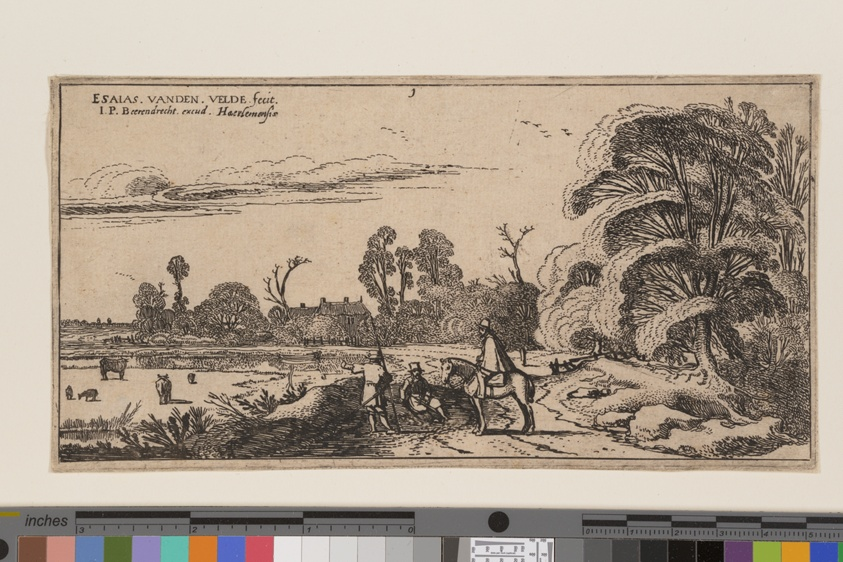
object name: Print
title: Path to the Right of a Field, from Landscapes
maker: Esaias van de Velde; Dutch, 1587–1630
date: c. 1610-1630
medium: Etching on ivory laid paper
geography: Netherlands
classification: etching; paper; print; prints and drawing